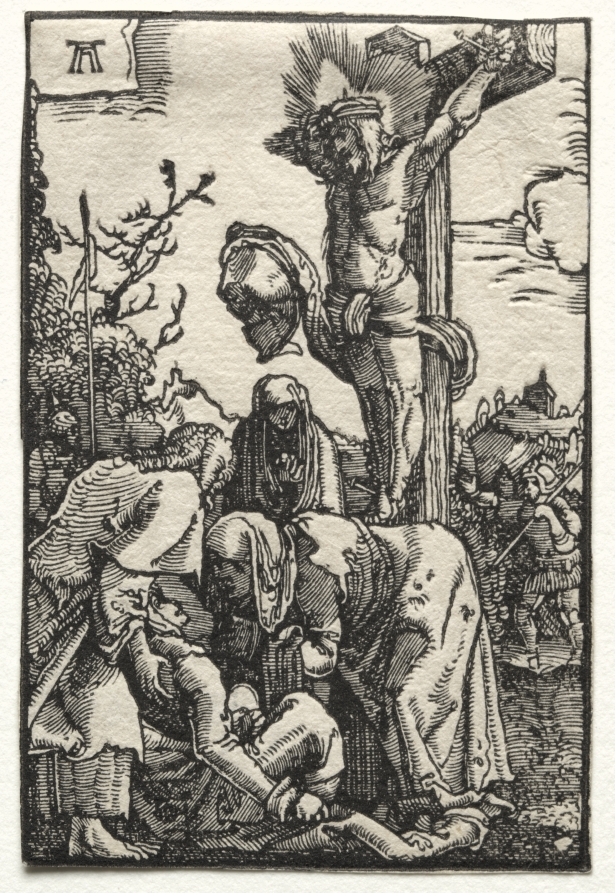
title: The Fall and Redemption of Man: Christ on the Cross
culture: Germany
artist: Albrecht Altdorfer (German, c. 1480–1538)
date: c. 1515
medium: woodcut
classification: Print